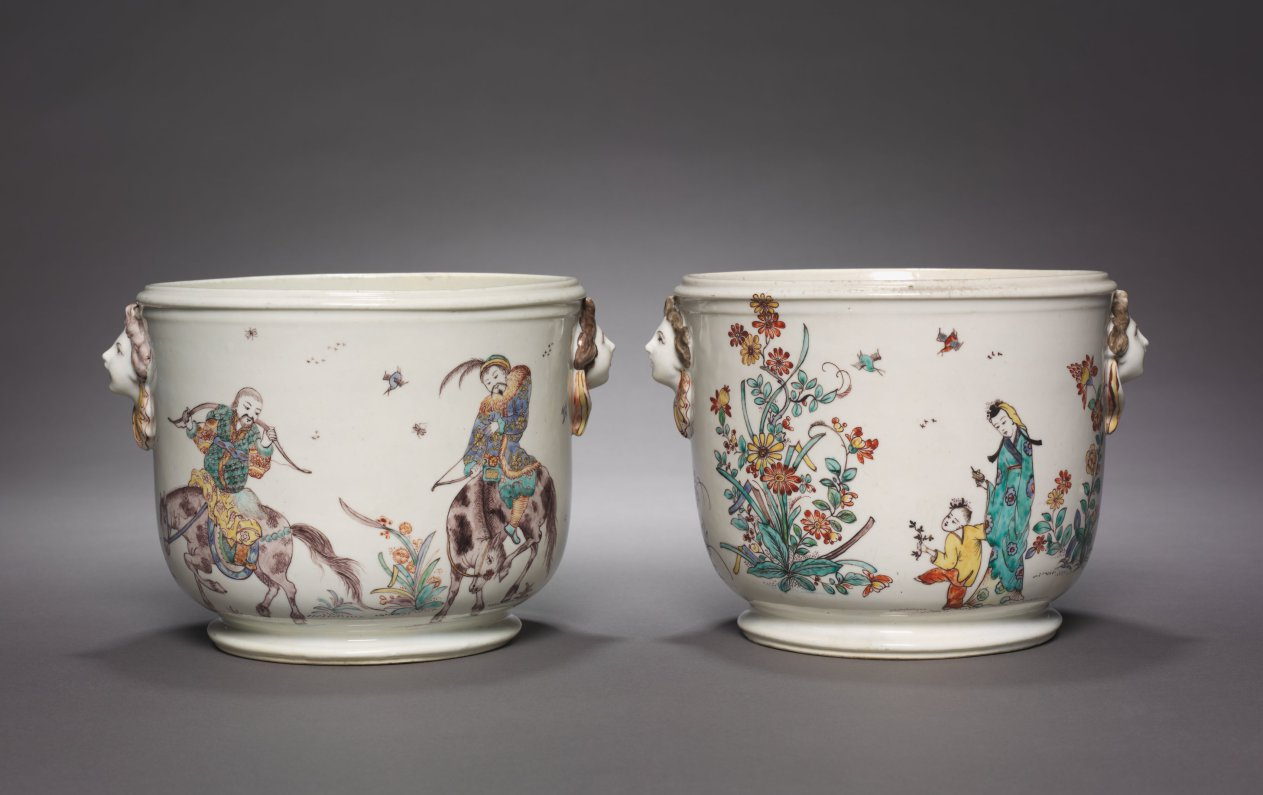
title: Pair of Bottle Coolers (seaux à rafraîchir)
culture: France, Villeroy, 18th century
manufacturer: Villeroy Factory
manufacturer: Mennecy- Villeroy Factory (French)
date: c. 1740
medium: Tin-glazed soft-paste porcelain with enamel decoration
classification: Ceramic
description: These bottle coolers combine a traditionally European form based on silver models with designs and compositions that emulate Chinese and Japanese porcelain. Towering over the figures the luxuriant, vividly colored vegetation is characteristic of chinoiserie, imitations of East Asian decoration and design common in 18th-century European decorative arts. Distorted by the European imagination, these imitations were not accurate representations of the cultures from which they drew inspiration.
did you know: The four figures on horseback are derived from prints French designer Jean Antoine Fraisse modeled after textiles, lacquers, and porcelains found in the collection of Louis-Henri, duke of Bourbon.